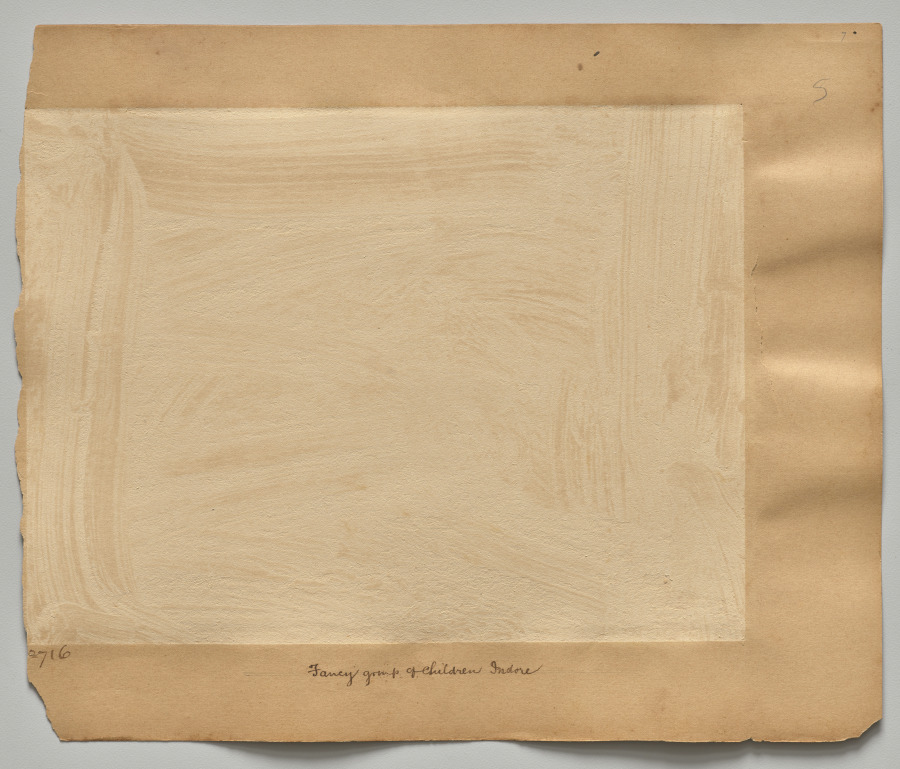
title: Captain Watkins and Non Com. officers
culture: India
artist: Raja Deen Dayal (Indian, 1844–1905)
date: c. 1882–87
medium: albumen print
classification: Photograph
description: These photographs are part of an album, now disassembled, of around 105 photographs taken in India between 1885 and summer 1887 that provide glimpses into the lives of the British colonial elite and royal and upper-class Indians. The museum holds another group of 37 pictures from this album (2016.266), which was probably commissioned by a British civil servant visiting or working in India around 1888 as a personal souvenir of his experiences there.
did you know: Raja Deen Dayal is regarded now, and was considered during his lifetime, to be India’s most important 19th-century photographer.